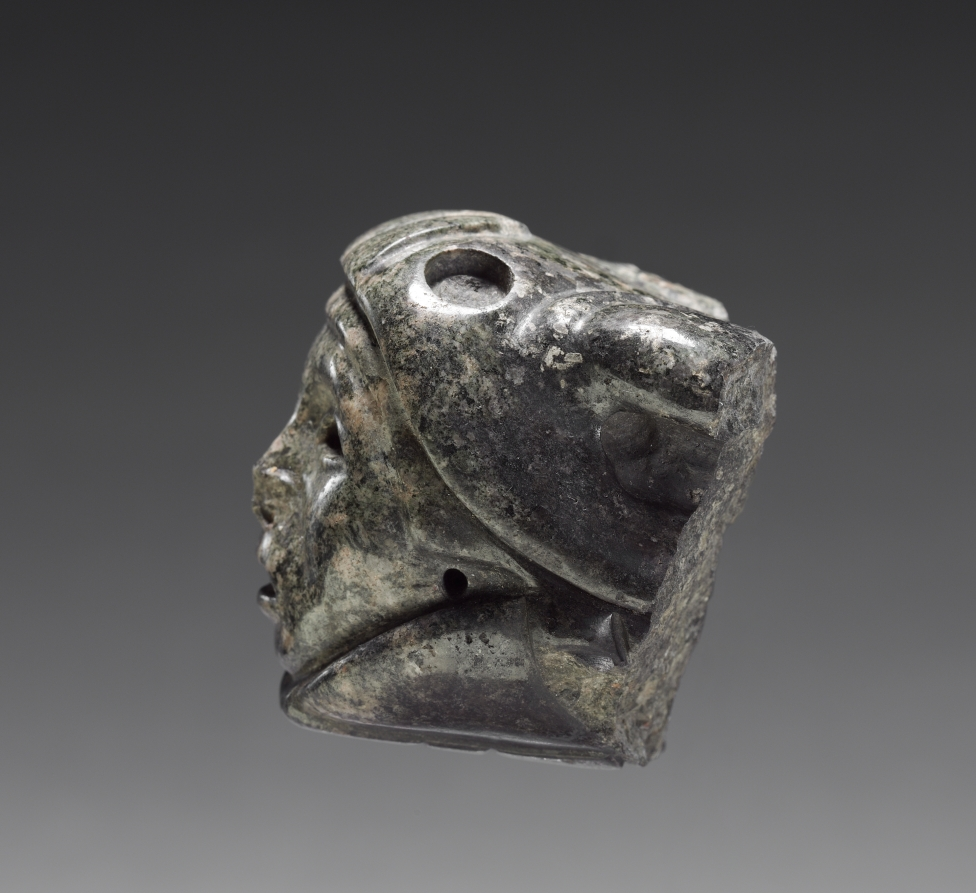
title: Head in Mouth of Snake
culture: Central Mexico, Aztec, Post-Classic Period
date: 1325–1519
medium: greenstone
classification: Stone